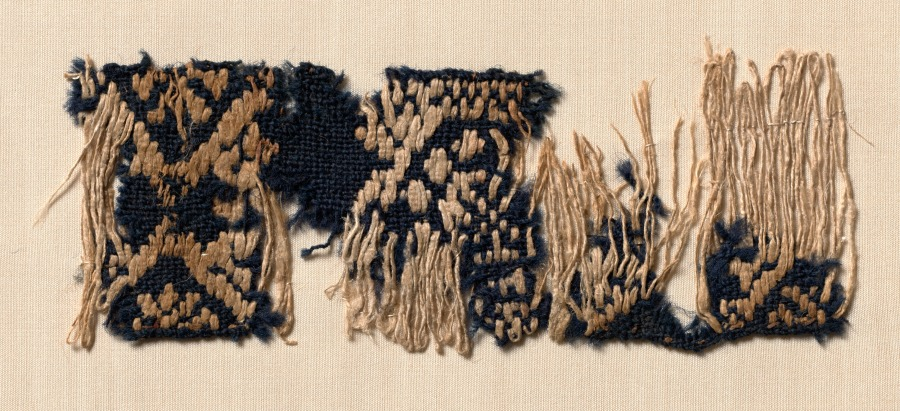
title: Fragment of Burial Clothing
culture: Egypt, Egypto-Arabic, c. 10th - 11th century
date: 900s - 1000s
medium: embroidery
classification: Embroidery